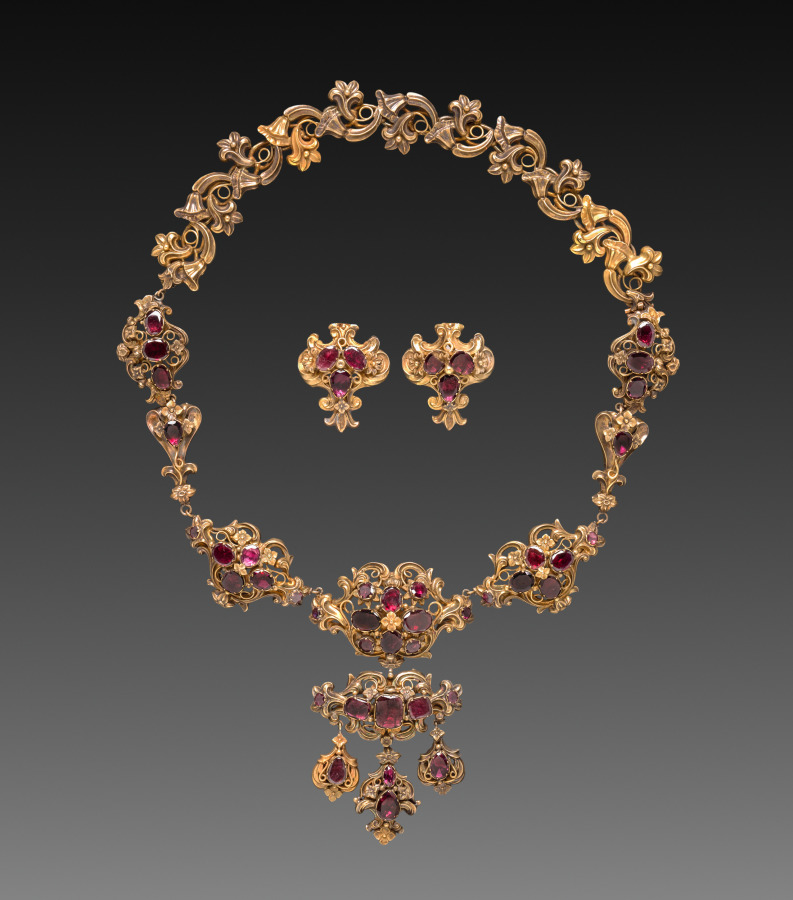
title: Set of Gold Jewelry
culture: Germany, possibly, 19th century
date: c. 1840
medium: gold and jewels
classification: Jewelry